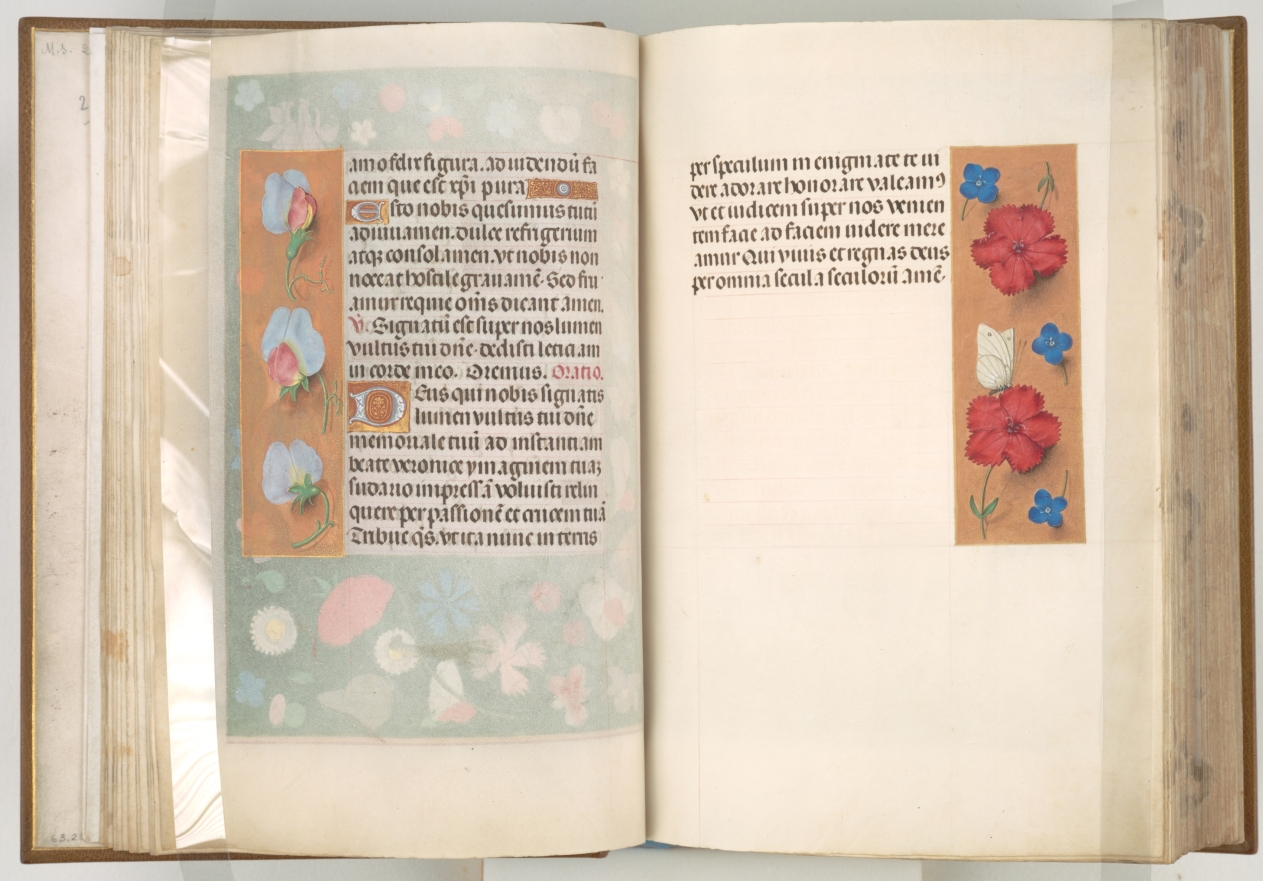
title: Hours of Queen Isabella the Catholic, Queen of Spain: Fol. 16r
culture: Flanders, Ghent and Bruges, late 15th century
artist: Master of the First Prayerbook of Maximillian (Flemish, c. 1444–1519)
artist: and Associates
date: c. 1500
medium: ink, tempera, and gold on vellum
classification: Bound Volume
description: This manuscript was illuminated by a circle of at least five highly organized manuscript painters active in the Flemish cities of Ghent and Bruges. The principal illuminator was Alexander Bening, who painted the majority of the book's miniatures. Manuscripts produced by this circle of artists are renowned for the decoration of their borders, which typically feature a rich variety of realistically-painted flowers, birds, and butterflies. This prayer book, called a book of hours, was intended not for a cleric, but for the private devotions of a lay person-in this case, Isabella the Catholic, Queen of Spain (1451-1504). Isabella's coat of arms embellishes the book's frontispiece. It is unlikely that the book was commissioned by the Queen herself; rather, she probably received it as a diplomatic gift from someone courting her patronage, perhaps Cardinal Francisco Jimenez de Cisneros. A Franciscan friar, Jimenez was dependent upon Isabella for his advancement, first to the post of Queen's confessor in 1492, and then to Archbishop of Toledo in 1495.